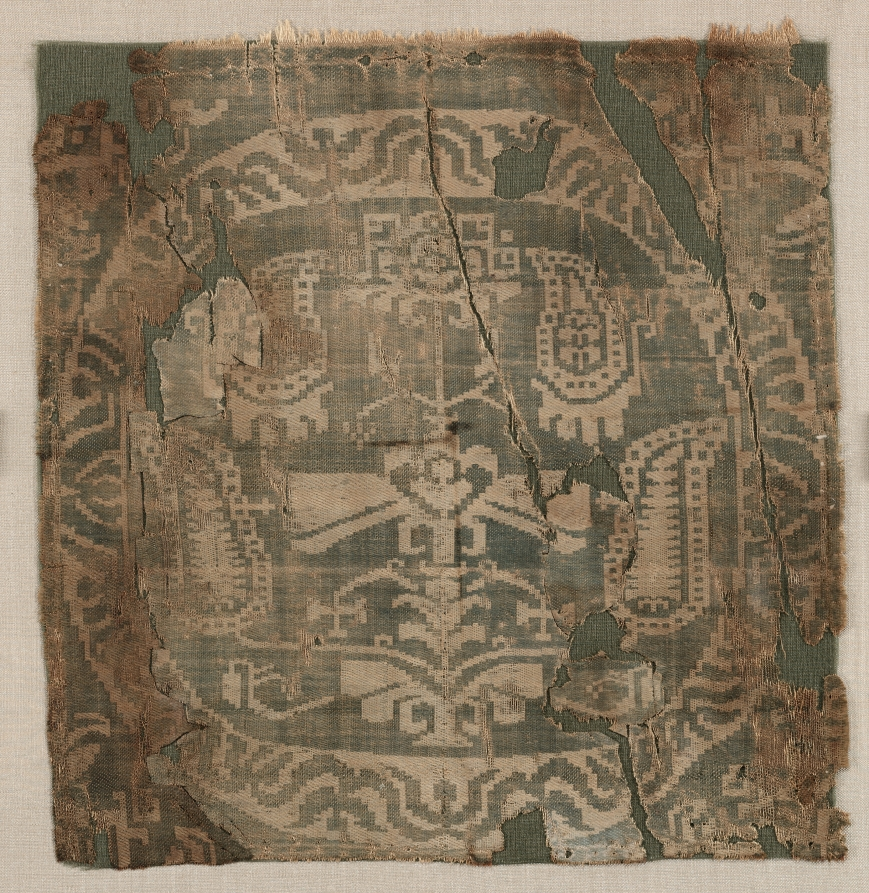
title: Roundel from a Tunic with Palmette Tree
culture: Egypt or Syria(?)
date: 650–850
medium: Silk; complementary weft-faced twill weave with inner warps (samite)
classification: Textile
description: Four or six squares of this luxurious two-color silk were originally sewn on a linen tunic, two positioned above the hemline in the front and two in the back, and possibly two more at the shoulder. The folded edges are still visible, including a silk sewing thread on the right side. The brittle condition is evident in the numerous crisp breaks.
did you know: Originally designed in Byzantine Egypt or possibly Syria, patterns like this were woven throughout a period of two to four centuries.